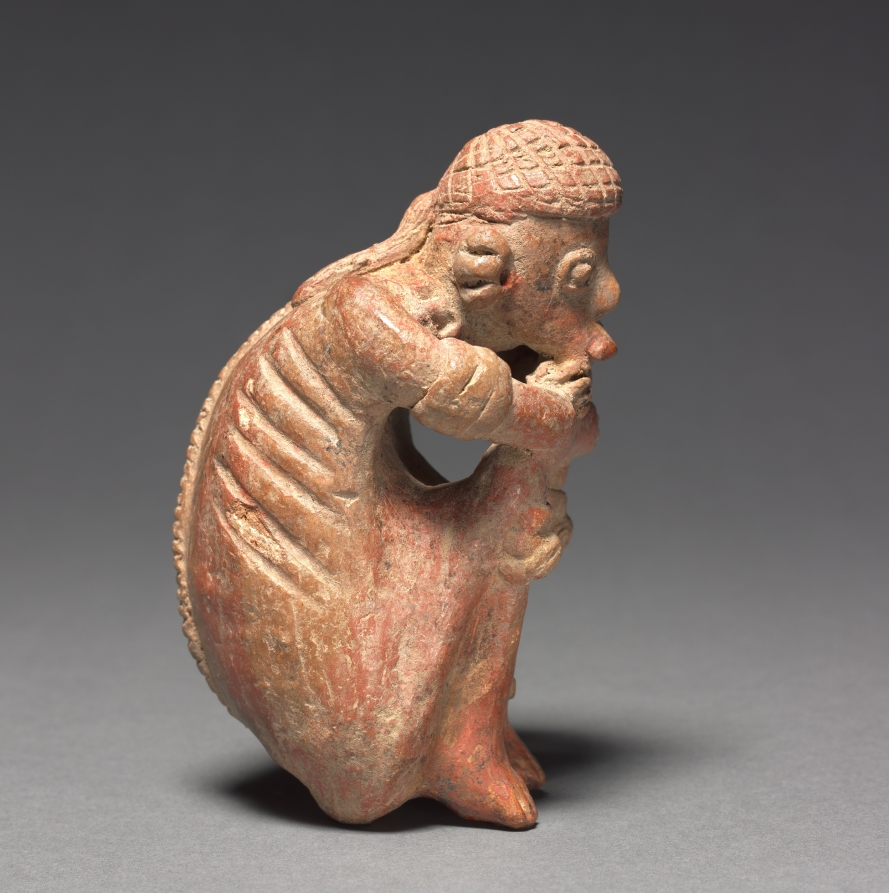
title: Emaciated Crouching Figure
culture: Mexico, Nayarit, San Sebastian Red Style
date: c. 100 BCE–300 CE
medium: earthenware with burnished red slip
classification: Sculpture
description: The protruding ribs and staring eyes of this melancholy figure may show the effects of a ritual fast, rather than famine. Fasting purified an individual in preparation for religious rites and may have enhanced the search for supernatural visions.